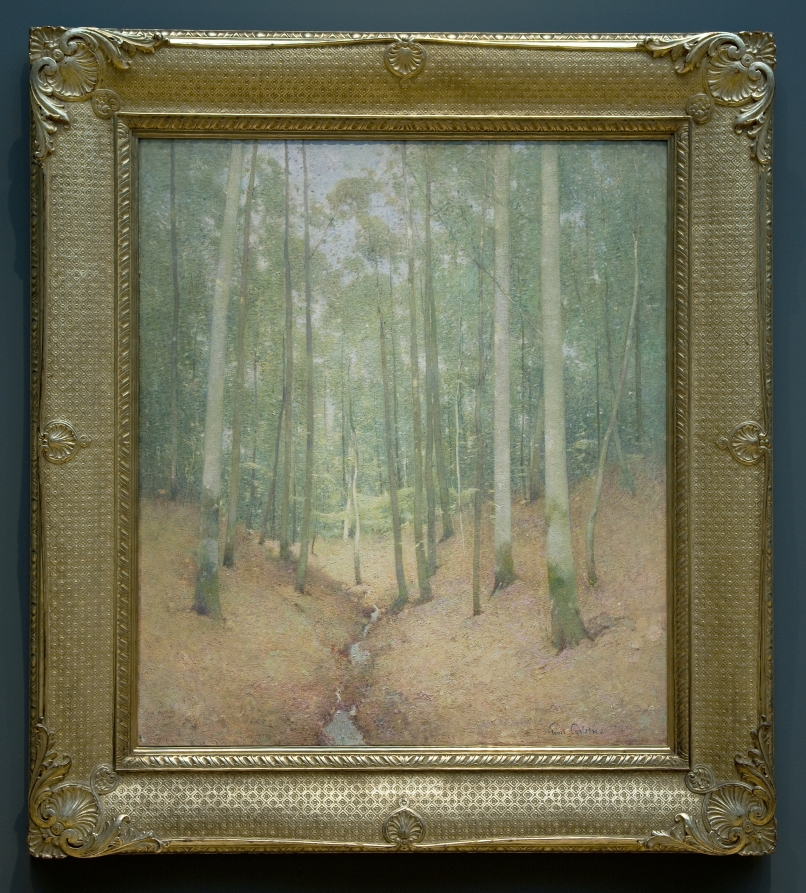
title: Wood Interior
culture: America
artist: Emil Carlsen (American, born Denmark, 1848–1932)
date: c. 1910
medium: oil on canvas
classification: Painting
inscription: signed lower right: Emil Carlsen.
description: Through luminescent color, filtered light, and a subtle evocation of atmosphere, Carlsen created a quiet, meditative mood in Wood Interior. The delicate trees, trickling brook, and soft bed of the forest floor invite a tranquil retreat from bustling city life. The painting’s lighter palette is complemented by its custom-made gilded frame, which is crafted in muted 16-karat gold rather than the standard, more vibrant 18-karat.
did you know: Carlsen’s son Dines also became a professional artist, and the two exhibited together several times.